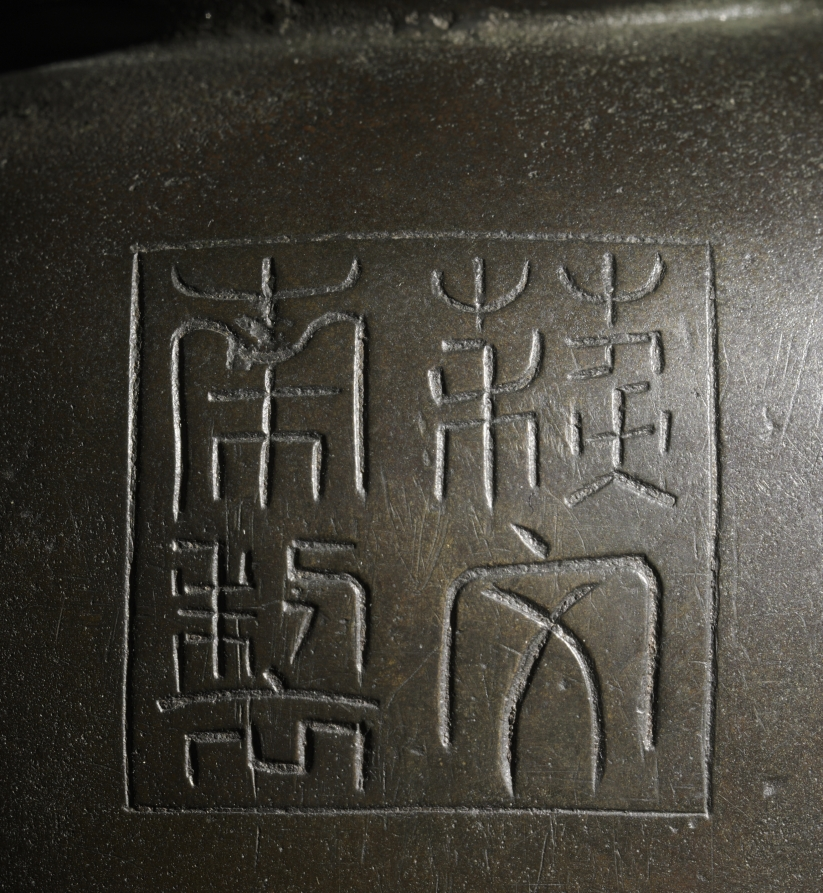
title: The Immortal Li Tieguai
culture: China, Ming dynasty (1368–1644)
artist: Su Wennan (Chinese)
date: 1500s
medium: bronze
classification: Sculpture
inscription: 蘇文南製 (Su Wennan Zhi )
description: This bronze statue of Li Tieguai shows him dressed as a beggar in a tattered robe, holding a crutch in his right and a ball of medicine in his left hand. Li Tieguai is the patron saint for physicians and legend says that he dispenses pills from the gourd for the sick. He wears a belt of leaves and another gourd hangs from his waist. His head is crowned with what appears to be a metal ring, signifying his immortal status. Four incised characters in seal script on the back of the figure reads “made by Su Wennan (蘇文南製).”